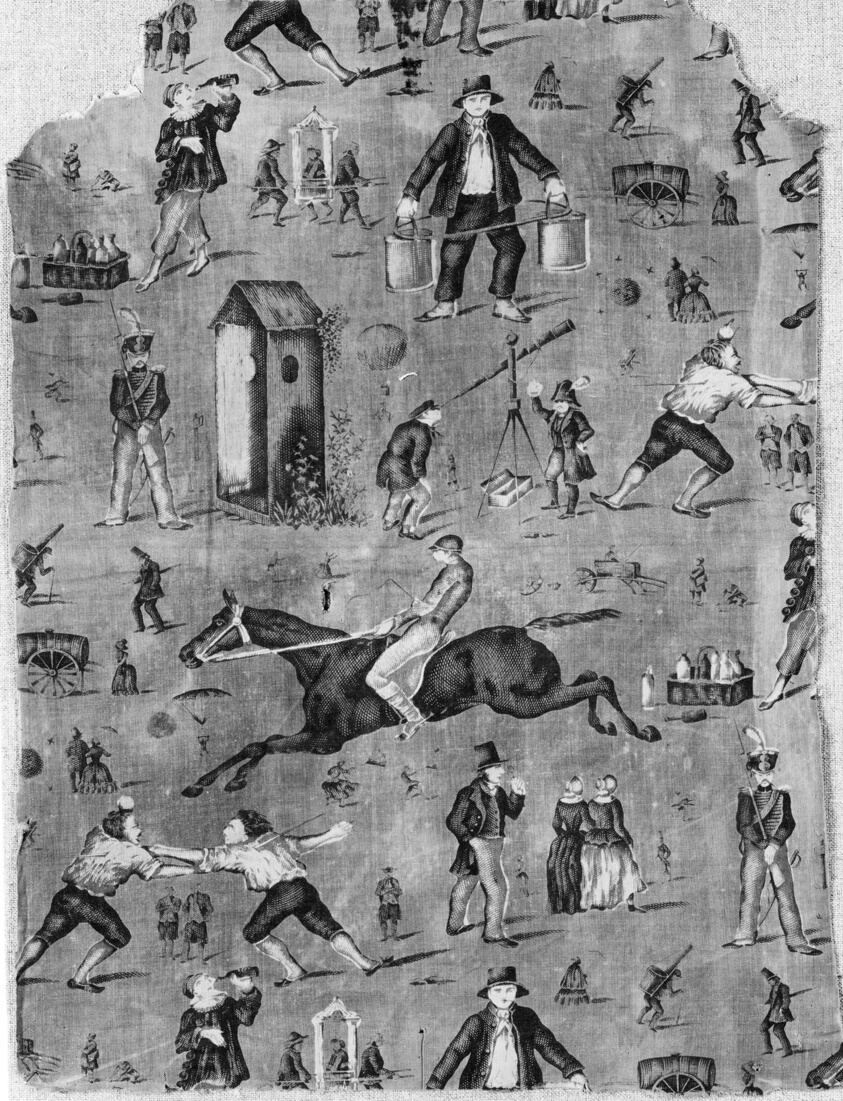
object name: Textile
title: Panel (Furnishing Fabric)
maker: England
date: c. 1820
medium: Cotton, plain weave; printed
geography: England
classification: textile; weaving - printed; weaving; furnishing textile